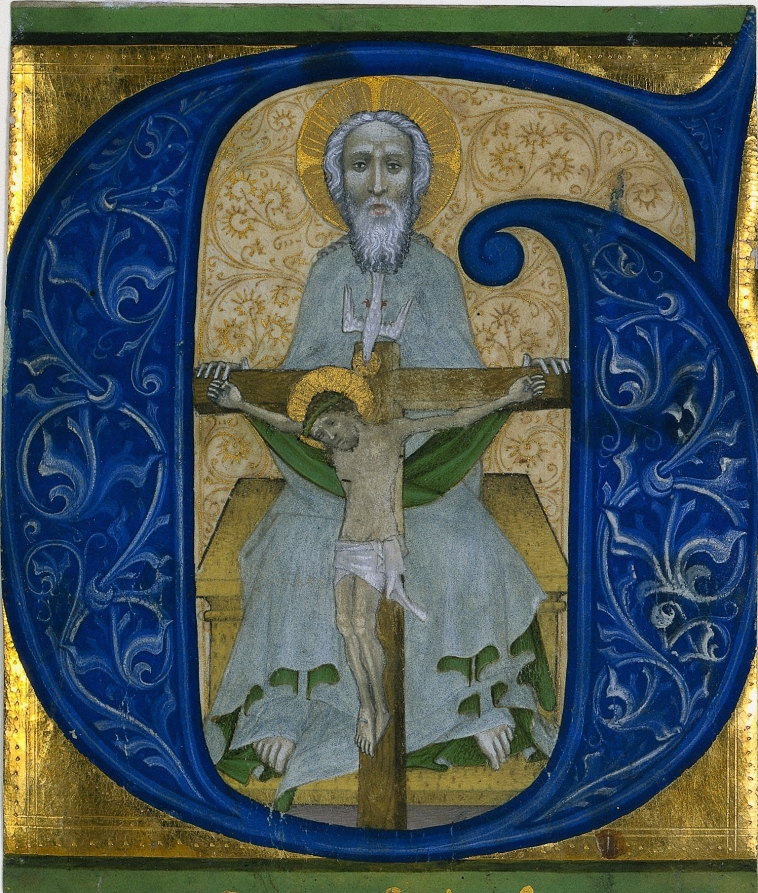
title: Cutting from an Antiphonary: Initial G[loria tibi Trinitas]: The Trinity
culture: Bohemia, Prague, early 15th Century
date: c. 1410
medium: ink, tempera, and gold on parchment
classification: Manuscript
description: This beautiful initial comes from a choral book called an antiphonary. The text introduced by this initial is the antiphon that follows the reading of the nine psalms in the office of prime: Gloria tibi Trinitas... (Glory be to the Trinity). By the later Middle Ages, artists were representing the Trinity (Father, Son, and Holy Ghost) in the form shown here.